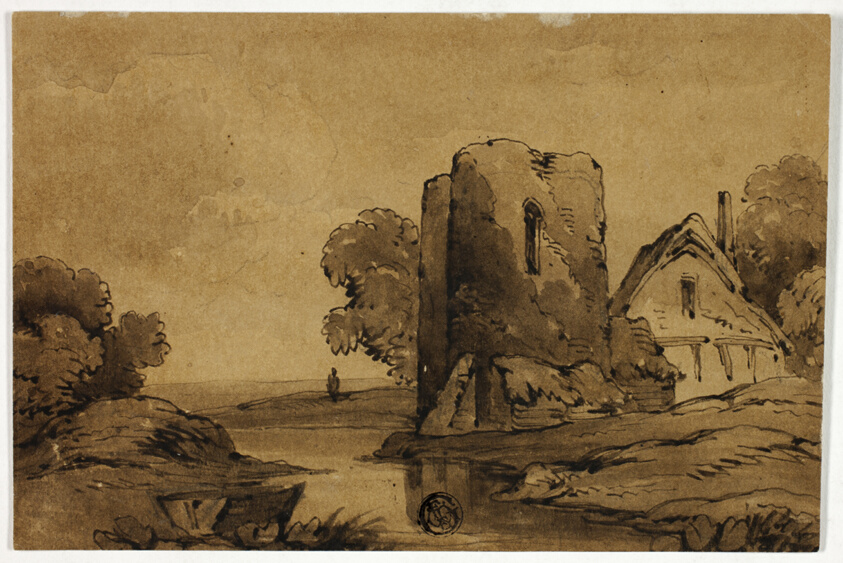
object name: Drawing and Watercolor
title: Cottage and Ruined Tower near Stream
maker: James "Drunken" Robertson (British, active 1815-1836)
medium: Pen and brown ink and brush and brown wash, over graphite, on tan wove paper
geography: England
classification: ink or chalk wash; drawings (visual works); prints and drawing